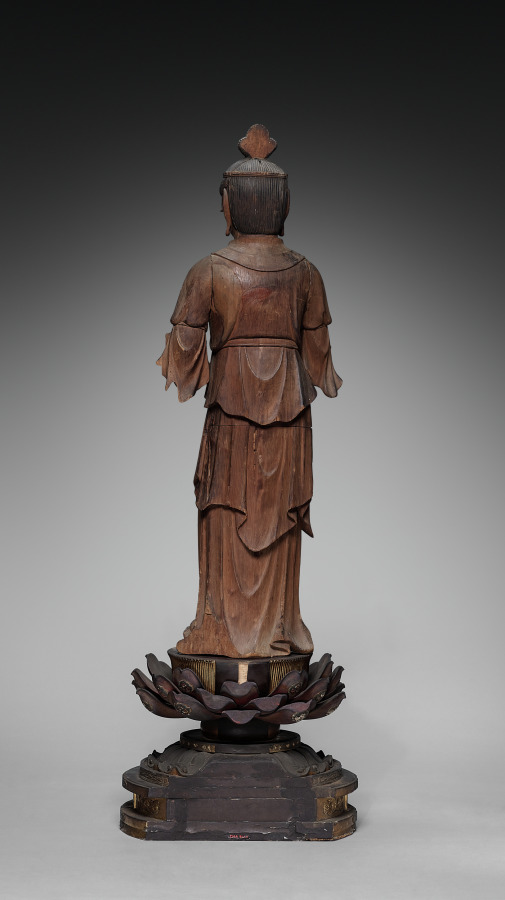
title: Batō (Horse-Headed) Kannon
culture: Japan, Kamakura period (1185–1333)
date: early 1300s, pedestal 1600s–1700s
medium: Wood with traces of color and gold; pedestal: wood with lacquer, color, and gold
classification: Sculpture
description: Batō Kannon, or Hayagriva Avalokiteshvara in Sanskrit, is the “horse-headed” form of the bodhisattva of compassion, who presides over the realm of animals in the Buddhist Six Realms of Transmigration (rebirth). A horse’s head appears in the hair of this sculpture to identify it. Bodhisattvas are beings who, though enlightened, choose to remain within the worlds of existence to help others. The six realms are heaven, hell, human, animal, hungry ghost, and ashura, or fierce supernatural entities.